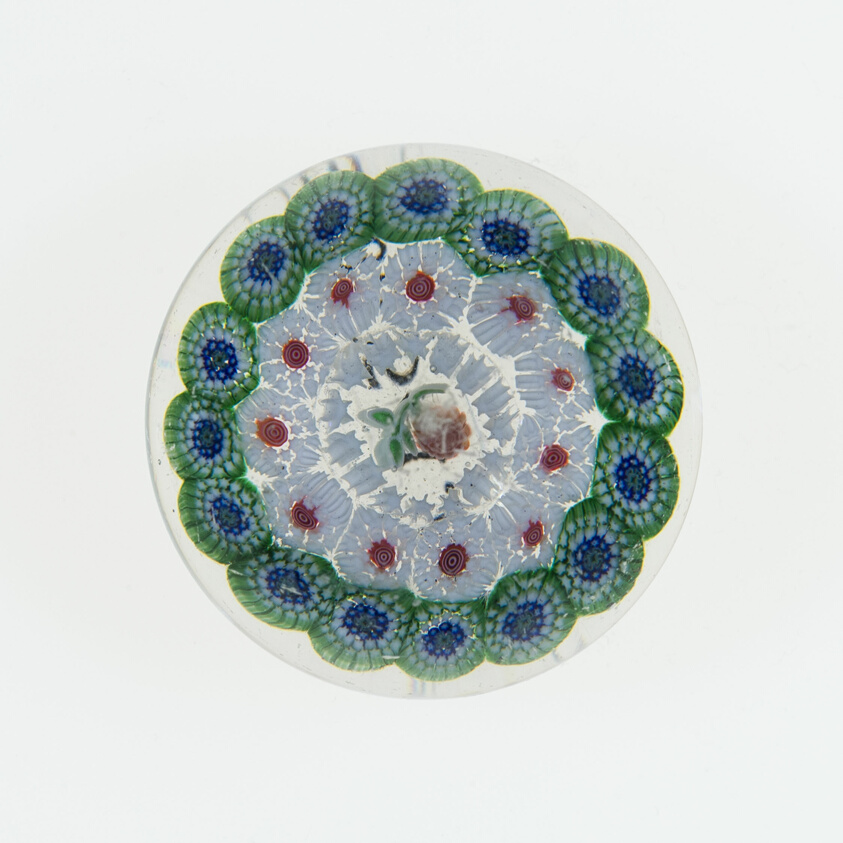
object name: Glass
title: Paperweight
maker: Baccarat Glassworks (Cristalleries de Baccarat); Lorraine, France, founded 1764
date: c. 1845/60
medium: Glass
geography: France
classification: paperweight; glass